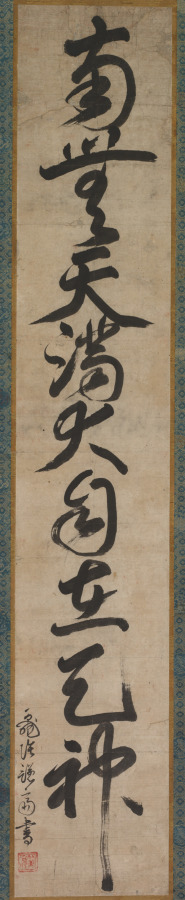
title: Sacred Name of Tenjin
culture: Japan, Muromachi period (1392–1573)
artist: Sakugen Shūryō (Japanese, 1501–1579)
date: 1500s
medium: hanging scroll; ink on paper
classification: Calligraphy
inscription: signed: signature unread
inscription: Sealed: Sakugen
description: The story emerged in the early 1300s that the kami Tenjin had traveled to China and achieved enlightenment under a famous Buddhist meditation master. Paintings of the subject as well as written invocations of Tenjin’s name were highly valued by the monks of Japan’s Zen Buddhist communities, to which an invocation of Tenjin’s name brushed by Zen monk Sakugen Shūryō attests. Sakugen was both a poet and an official envoy to Ming China in the 1500s. Creating calligraphies of deities’ names was akin to painting religious icons.